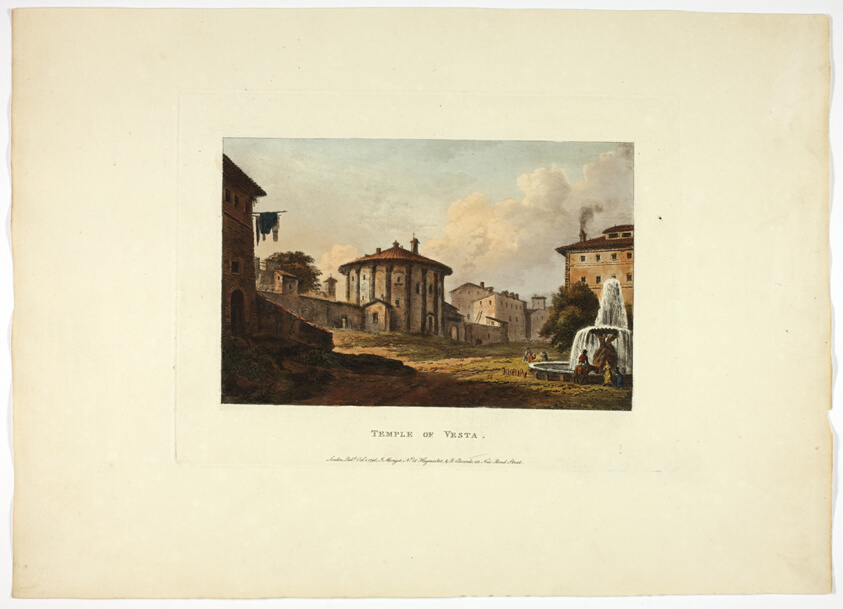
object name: Print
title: Temple of Vesta, plate nineteen from the Ruins of Rome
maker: M. Dubourg, (English, active 1786-1838); published by J. Merigot (Italian, Unknown)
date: published October 1, 1796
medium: Hand-colored aquatint on paper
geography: England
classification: aquatint; print; prints and drawing